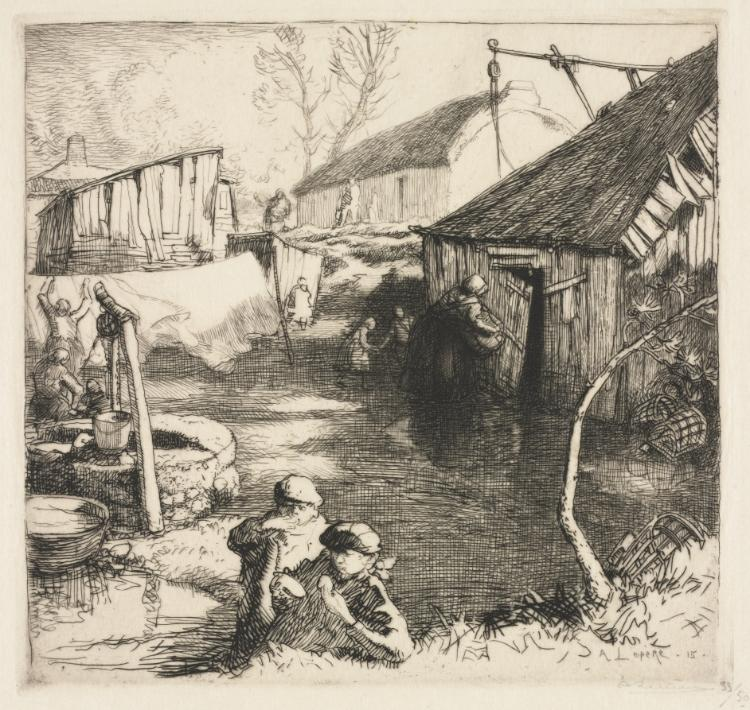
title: Fishermen's Quarters (Saint-Jean-de-Monts)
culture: France, 20th century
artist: Auguste Louis Lepère (French, 1849–1918)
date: 1915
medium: etching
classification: Print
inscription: lower right margin, in pencil: "A Lepere 33/50"